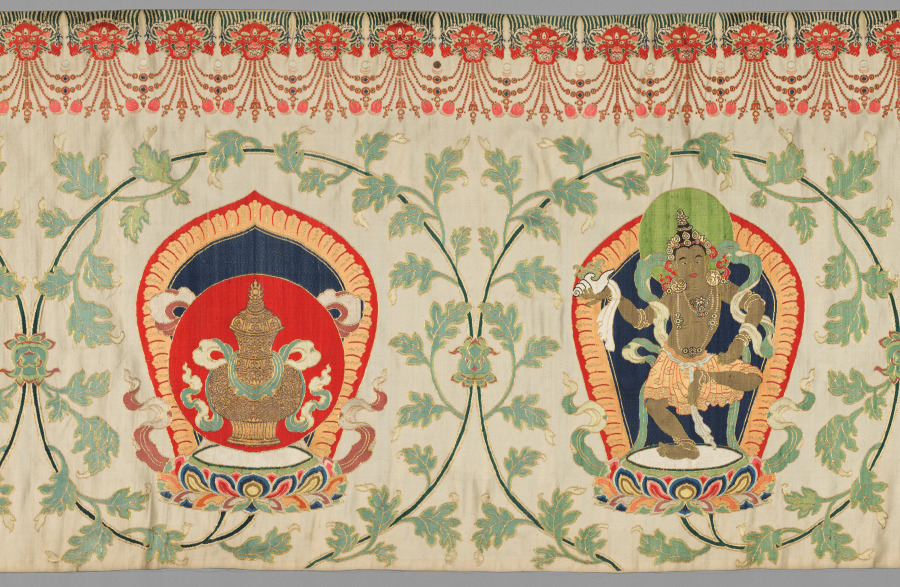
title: Brocaded Strip, known as "Imperial Tribute Brocade"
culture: China, Qing dynasty (1644-1911)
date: c. 1770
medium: brocaded satin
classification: Textile